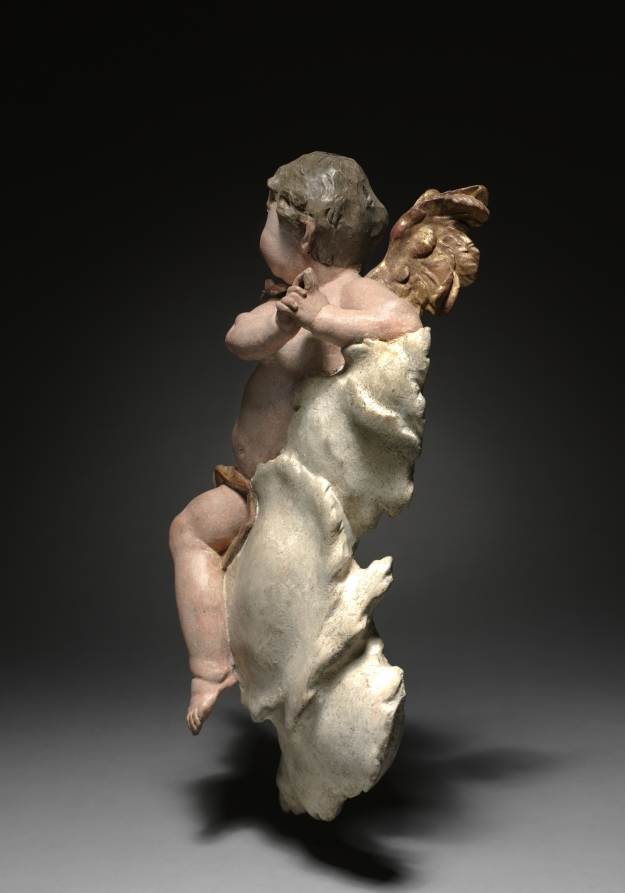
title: Putto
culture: Germany, Munich, 18th century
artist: workshop of Ignaz Günther (German, 1725–1775)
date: c. 1760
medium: painted and gilded wood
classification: Sculpture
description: This charming winged putto reclines on a cloud, hands clasped in an attitude of adoration. It is probably a fragment of a large decorative scheme of a church, perhaps the Johanneskirchen near Munich.